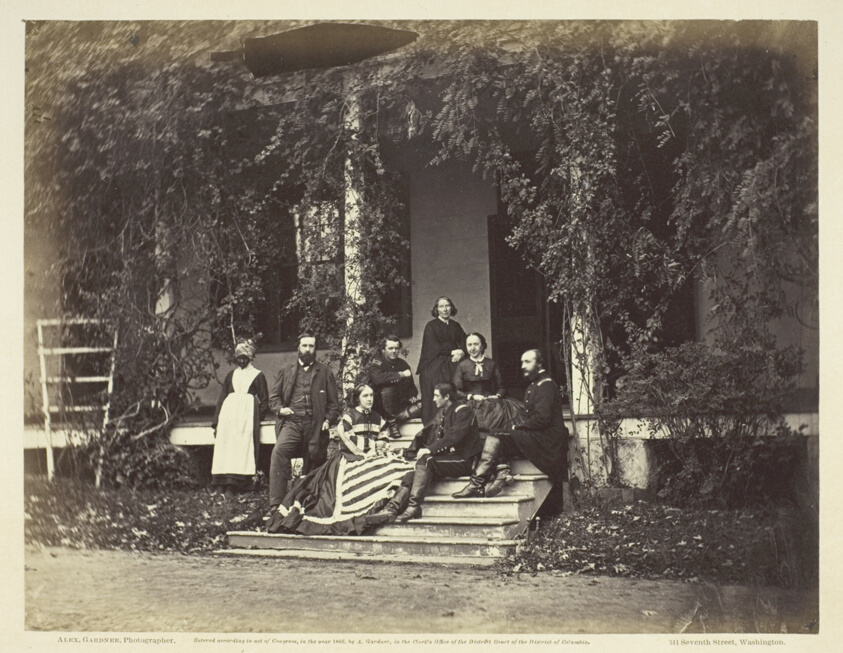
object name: Photograph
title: Scene in Pleasant Valley, Maryland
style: 19th century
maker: Alexander Gardner (American, born Scotland, 1821–1882)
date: October 1862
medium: Albumen print, pl. 24 from the album "Gardner's Photographic Sketch Book of the War, vol. 1" (1866)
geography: United States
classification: photograph; albumen silver print; photography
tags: Collected by Hugh Edwards, Gardner's Photographic Sketch Book